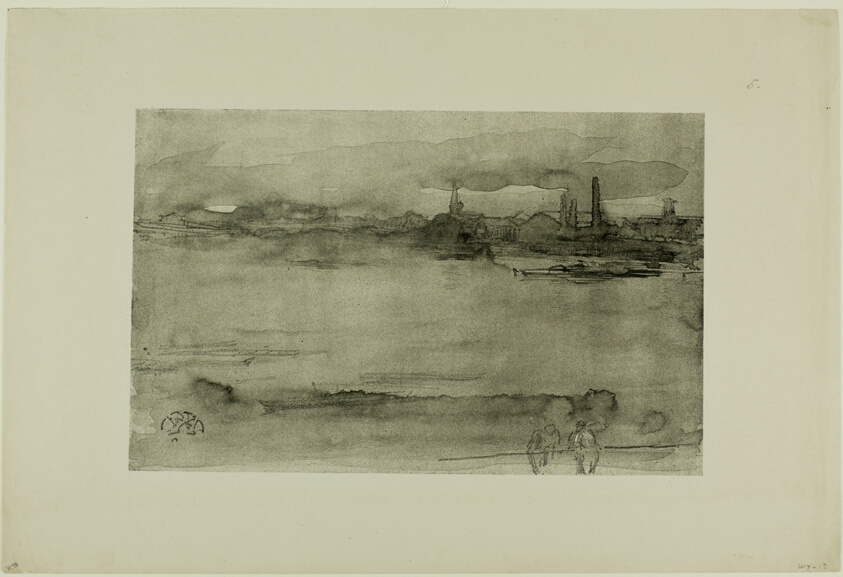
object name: Print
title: Early Morning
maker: James McNeill Whistler (American, 1834-1903)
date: 1878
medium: Lithotint with scraping, on a prepared half-tint ground, in black on cream wove proofing paper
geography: United States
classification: lithotint; lithograph; print; prints and drawing; paper